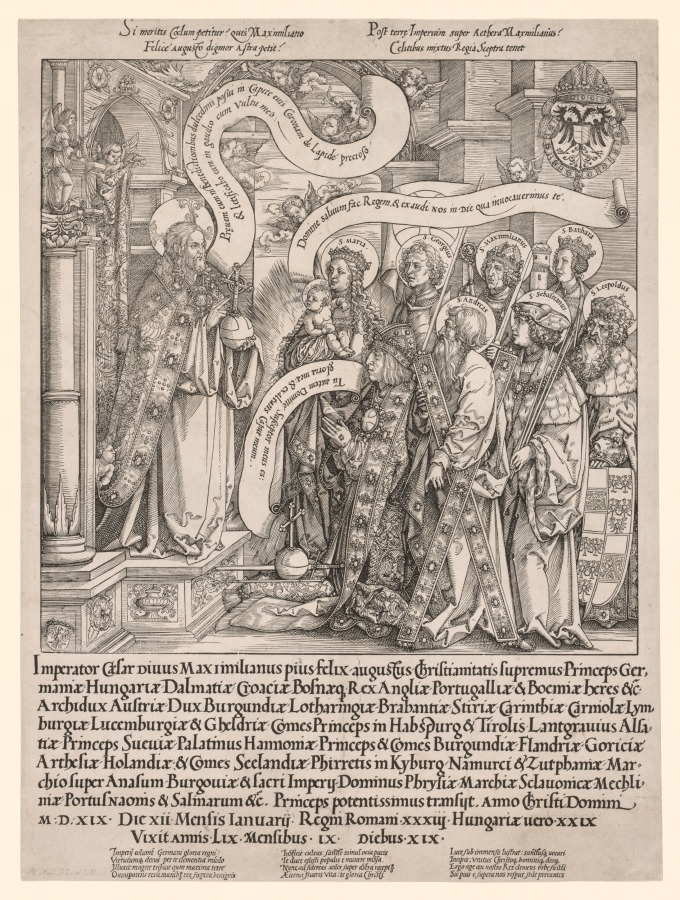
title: The Emperor Maximilian Presented by His Patron Saints to the Almighty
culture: Germany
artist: Hans Springinklee (German, 1540)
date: 1519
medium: woodcut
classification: Print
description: Like Wolf Traut, Springinklee was a pupil of Albrecht Dürer and remained in Nuremberg. Springinklee worked closely with Dürer and through him became involved with print projects to glorify Holy Roman Emperor Maximilian. Maximilian believed that large woodcut projects would be a cheap and effective way to ensure he would not be forgotten. He proclaimed, "He who during his life provides no remembrance for himself has no remembrance after his death and the same person is forgotten with the tolling of the bell, and therefore the money that I spend on remembrance is not lost."